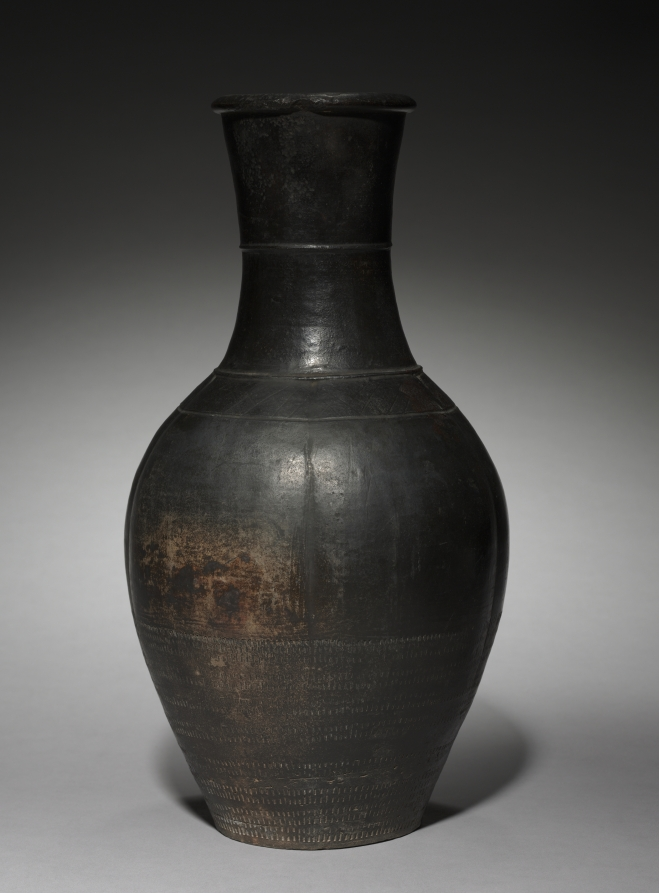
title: Vase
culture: Northeast China, Liao dynasty (916-1125)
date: 916–1125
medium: burnished stoneware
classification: Ceramic